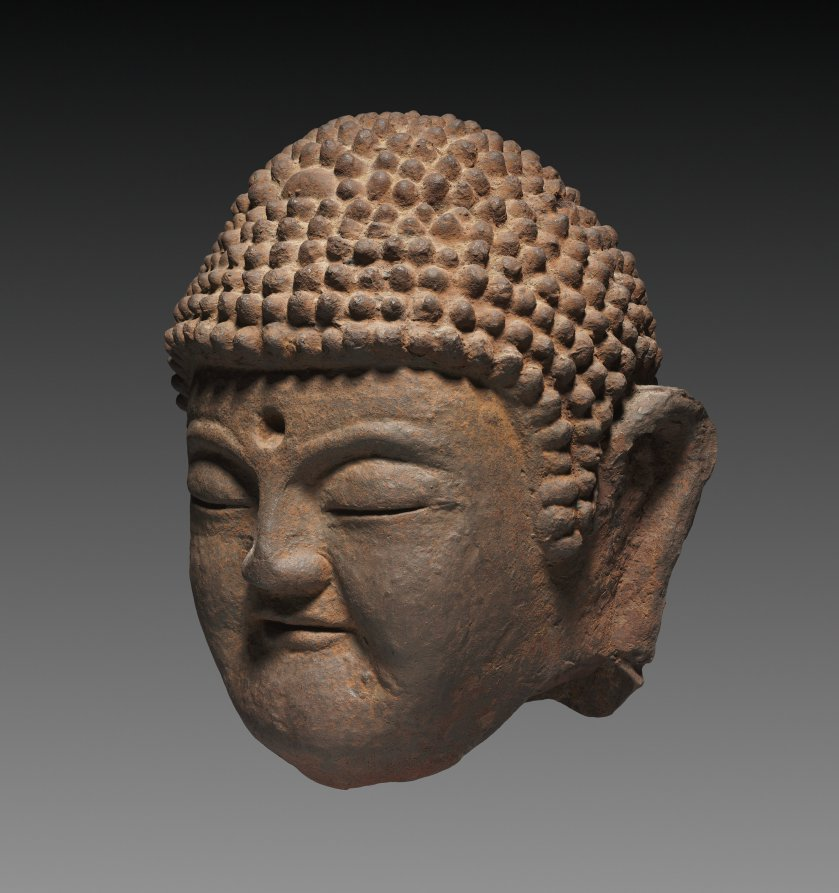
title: Buddha Head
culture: Korea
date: 1900s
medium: cast iron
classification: Sculpture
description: This Buddha has a soft and gentle smile, a typical attribute of Korean images of the Buddha. His plum cheeks and soft smile remind us of his childlike purity while his nearly closed eyes show him in a moment of meditation. The empty divot in the middle of the forehead would originally have contained a jewel symbolizing the light emanating from the Buddha. His head is topped with a profusion of snail-shell curls and an ushnisha, a mound symbolizing the Buddha’s enlightenment.